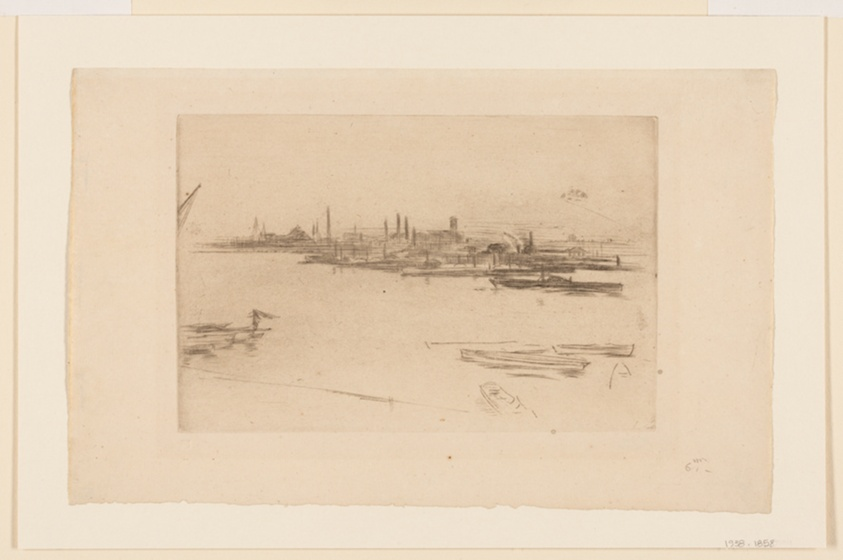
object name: Print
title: Battersea Morn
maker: James McNeill Whistler (American, 1834-1903)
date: 1877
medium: Drypoint in black ink on ivory laid paper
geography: United States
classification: drypoint; print; prints and drawing; paper